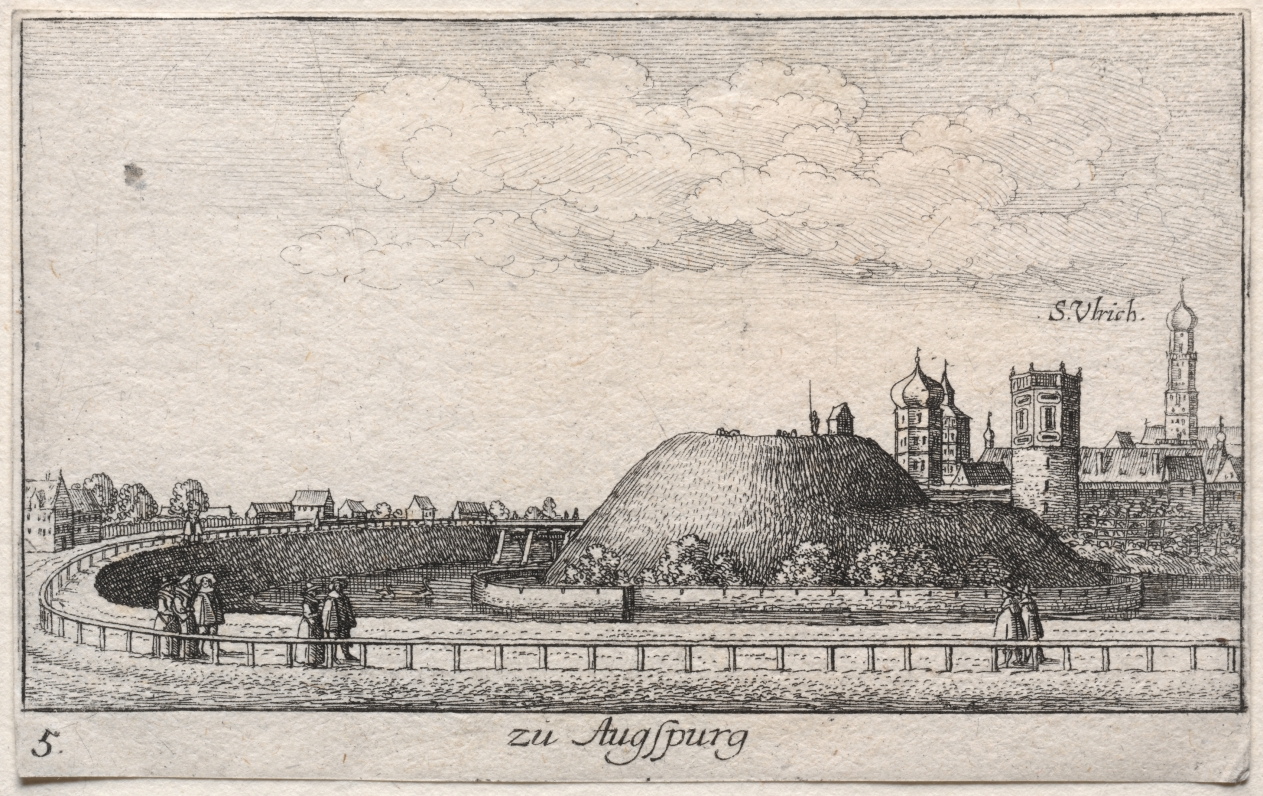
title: Amoenissimae aliquot locorvm...: Plate 5, Augsburg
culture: Bohemia, 17th century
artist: Wenceslaus Hollar (Bohemian, 1607–1677)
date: 1635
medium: etching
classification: Print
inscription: inscribed, lower margin, in plate: 5. zu Augspurg; inscribed, left, within image, in plate: S. Vlrich